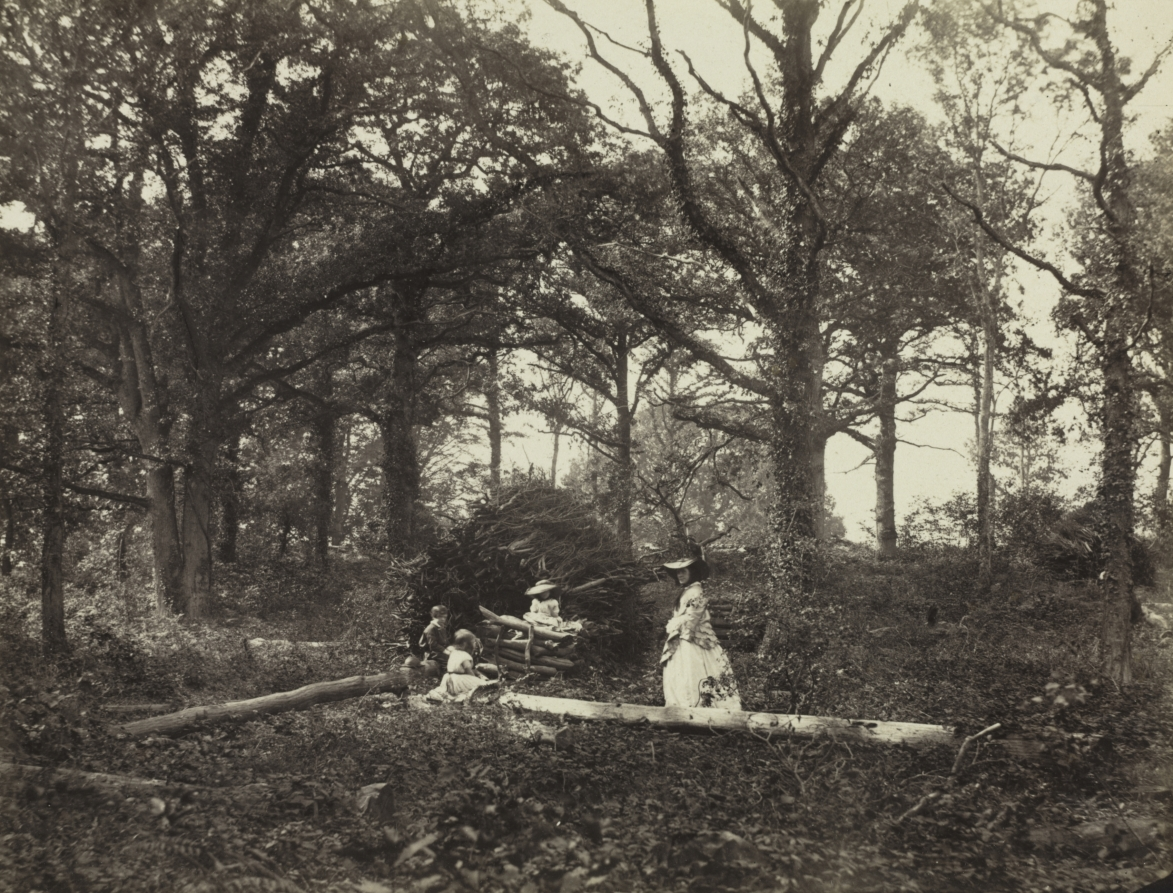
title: Landscape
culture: England, 19th century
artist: Henry White (British, 1819–1903)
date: 1856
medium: albumen print from wet collodion negative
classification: Photograph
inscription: Written in black ink on recto: "Photographed by Henry White"; in pencil on verso: "2500"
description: In the 1850s London lawyer Henry White was also recognized as one of Britain's most gifted landscape photographers. His work helped to establish the aesthetic standard for 19th-century British landscape photography. This charming image is an example of his best known work—intimate, lyrical landscapes taken in northern Wales. Here White carefully balanced his desire to faithfully record elaborate details with broad atmospheric effects. As with many of his photographs, this print registers a city-dweller's delight in finding himself in natural surroundings.